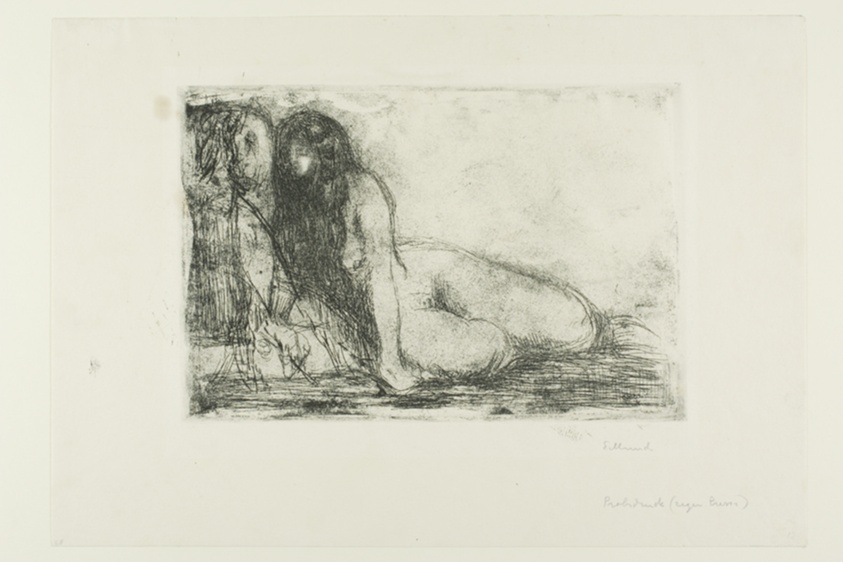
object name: Print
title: Secret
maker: Edvard Munch (Norwegian, 1863-1944)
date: 1913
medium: Etching, aquatint and drypoint on white wove paper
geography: Norway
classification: etching; print; prints and drawing